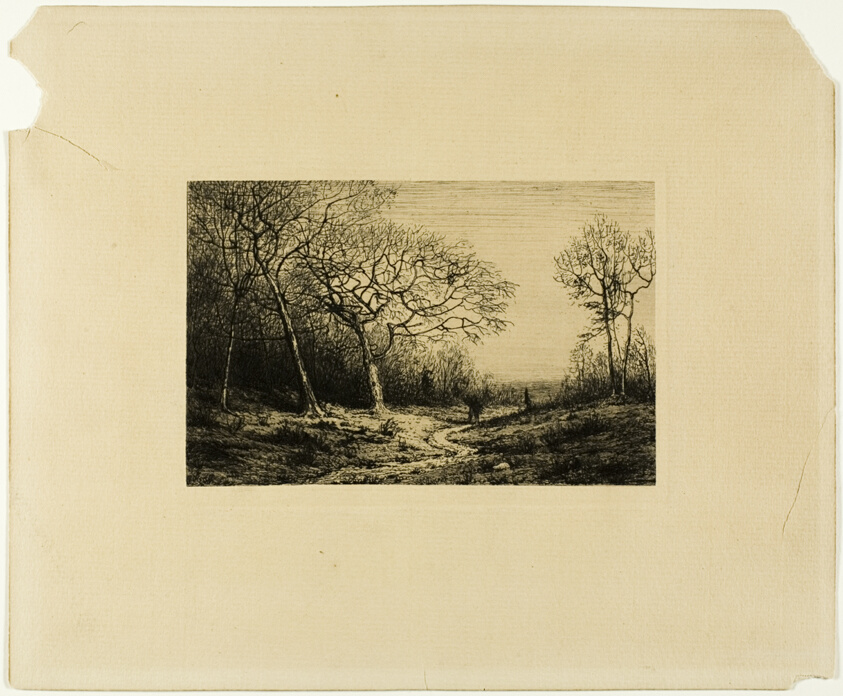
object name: Print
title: Edge of a Wood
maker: Charles Émile Jacque (French, 1813-1894)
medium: Etching on cream China paper laid down on cream laid paper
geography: France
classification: etching; print; prints and drawing